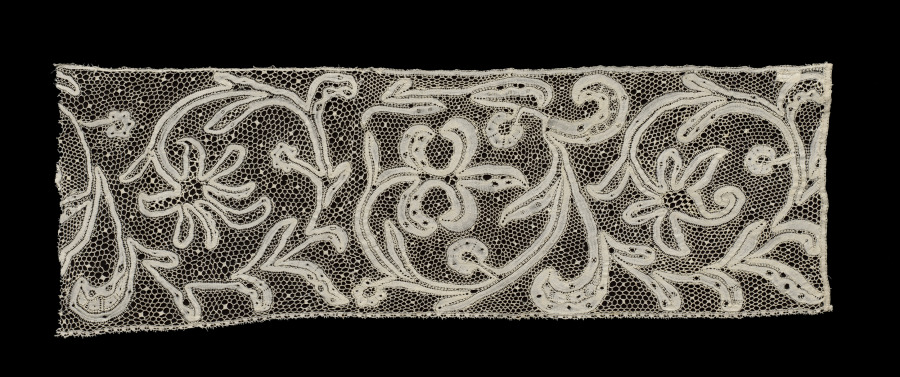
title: Fragment of a Lace Flounce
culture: Flanders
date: 1700s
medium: Linen: bobbin lace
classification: Lace